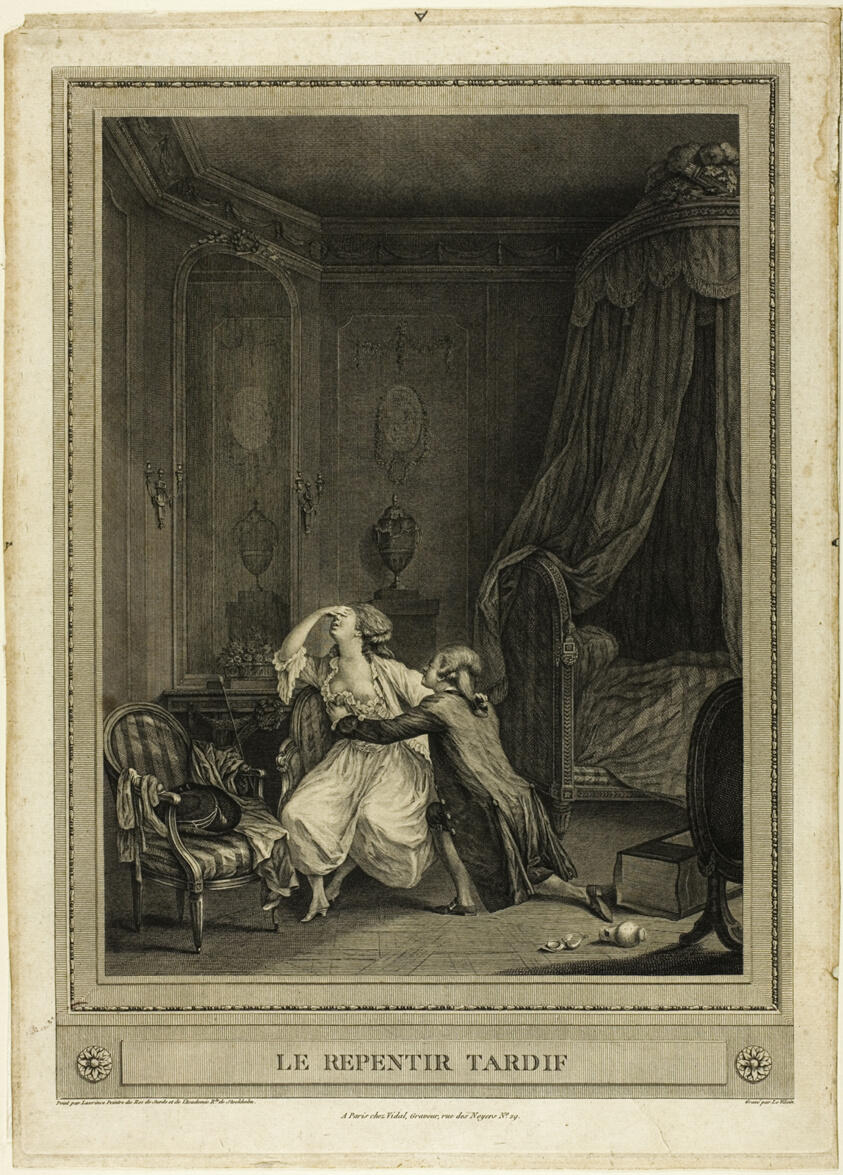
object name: Print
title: Tardy Repentance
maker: Ferdinand Levillain (French, 1837-1905); after Nicolas Lavreince (Swedish, 1737-1807)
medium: Etching on paper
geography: France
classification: etching; print; prints and drawing